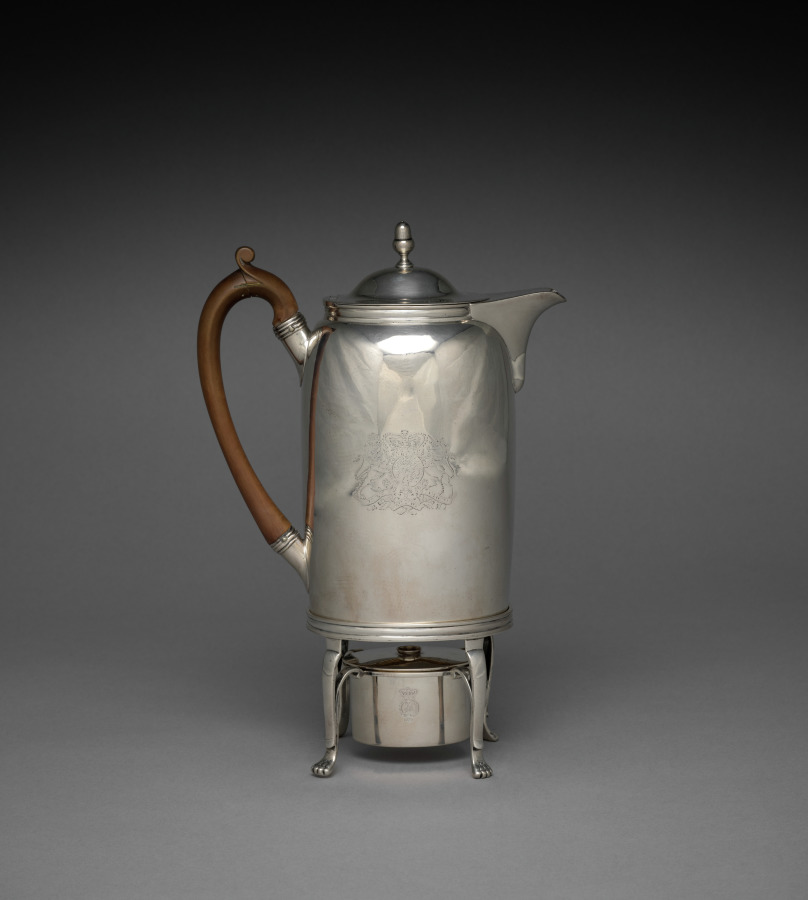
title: Hot Water Jug with Hinged Cover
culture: England, early 19th century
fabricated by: John (British) Edwards (British)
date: 1800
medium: silver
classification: Metalwork